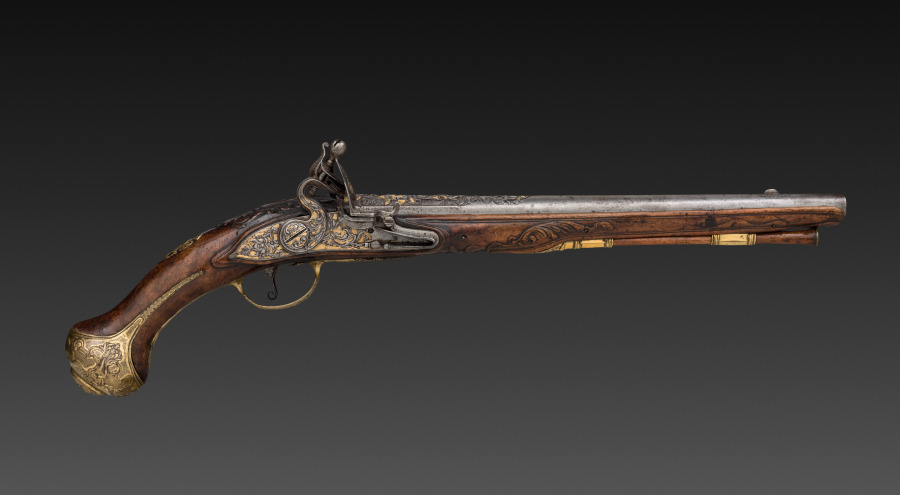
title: Flintlock Pistol (2 of 2)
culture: Franco-Flemish, Liège, early 18th Century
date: early 1700s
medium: steel with gold inlay, gilt-brass mounts; walnut burl stock; chiseled high-relief decoration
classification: Arms and Armor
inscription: on barrel: G. MASSIN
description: The barrel of this pistol is signed G. MASSIN, a gunsmith apparently working in eastern France or French-speaking Flanders, possibly the city of Liège. The exquisite ornament along the breech of the barrel is chiseled and engraved. The gilded lock-plate and mounts may be compared to the finest contemporary work in other media, such as furniture with ormolu mounts.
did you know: The flintlock ignition system was developed in the 1600s and remained the dominant system until the early 1800s.